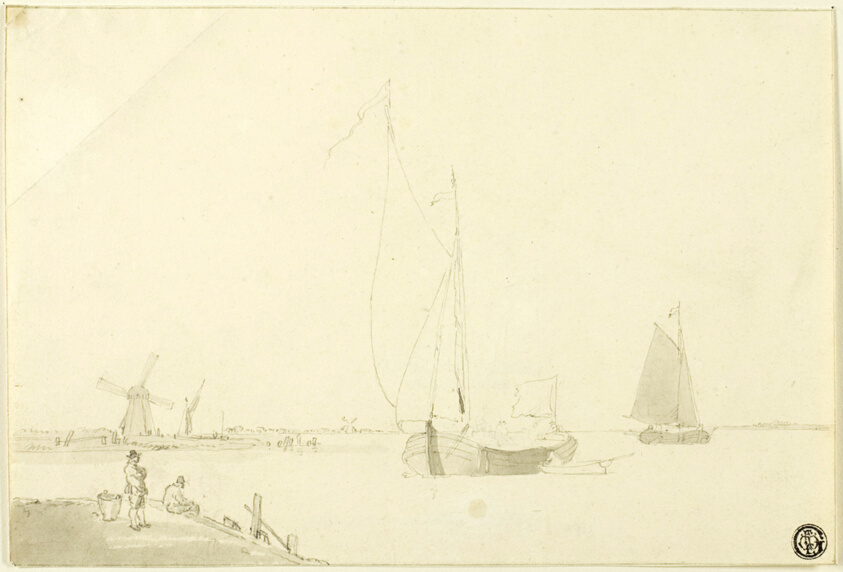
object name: Drawing and Watercolor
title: Dutch Coast Scene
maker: William Anderson (Scottish, 1757-1837); or John Sell Cotman (English, 1782-1842)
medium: Graphite with brush and gray wash on ivory wove paper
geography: Scotland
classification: graphite; drawings (visual works); prints and drawing